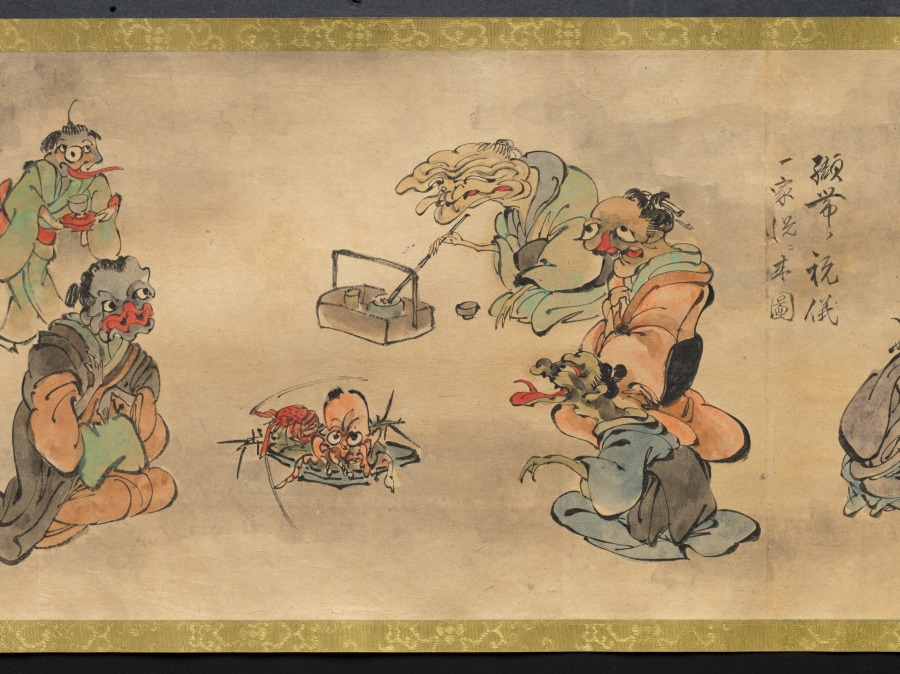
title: An Illustrated Marriage of Apparitions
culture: Japan, Edo period (1615–1868)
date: mid-1800s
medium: handscroll; ink and color on paper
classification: Painting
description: The matchmaking, engagement, wedding, and birth of the first child of two apparitions, or bakemono, literally "things that change," are illustrated in this whimsical, humorous handscroll. Japanese folklore abounds with such strange creatures, most famously represented in handscrolls featuring a procession of 100 supernatural monsters. Aside from a textual preface and cartouches indicating the content of the scenes, the tale is told visually. The artist and whereabouts of the original handscroll are unknown, but a number of other 19th-century copies by amateur painters exist in Japanese collections, attesting to its broad appeal.